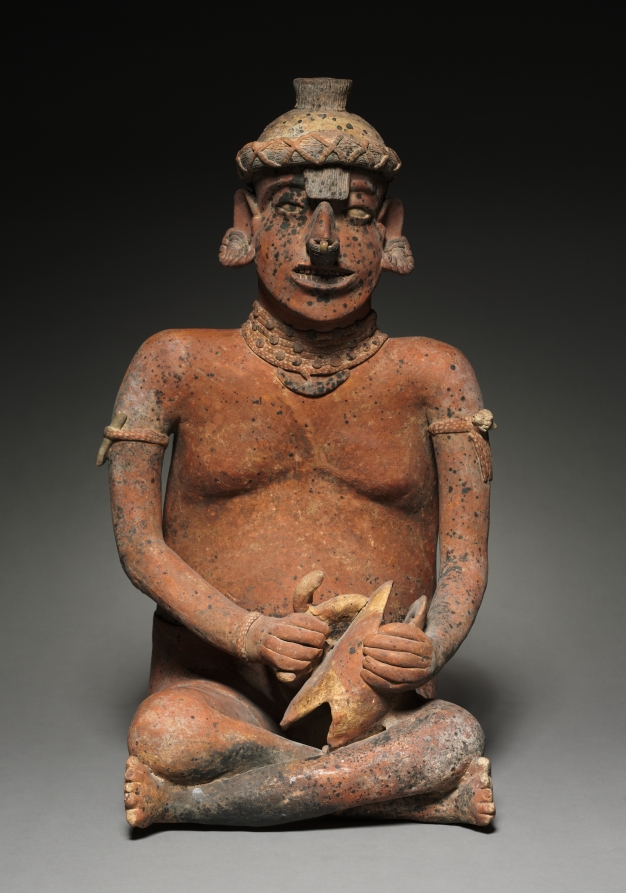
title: Male Seated Figure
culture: Mexico, Nayarit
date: 100 BCE–300 CE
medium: ceramic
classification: Ceramic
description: This couple-extremely fine examples of their kind-may commemorate the marriage of an important person, such as a chief, but could also represent siblings of a chiefly family. Whatever their relationship, their unity is conveyed by their physical similarities, including their jewelry, which marks high social station. The female is unusual in nursing an infant, likely a reference to generational renewal and the continuation of noble bloodlines. The significance of the male’s activity-beating a turtle-shell drum- is not understood.